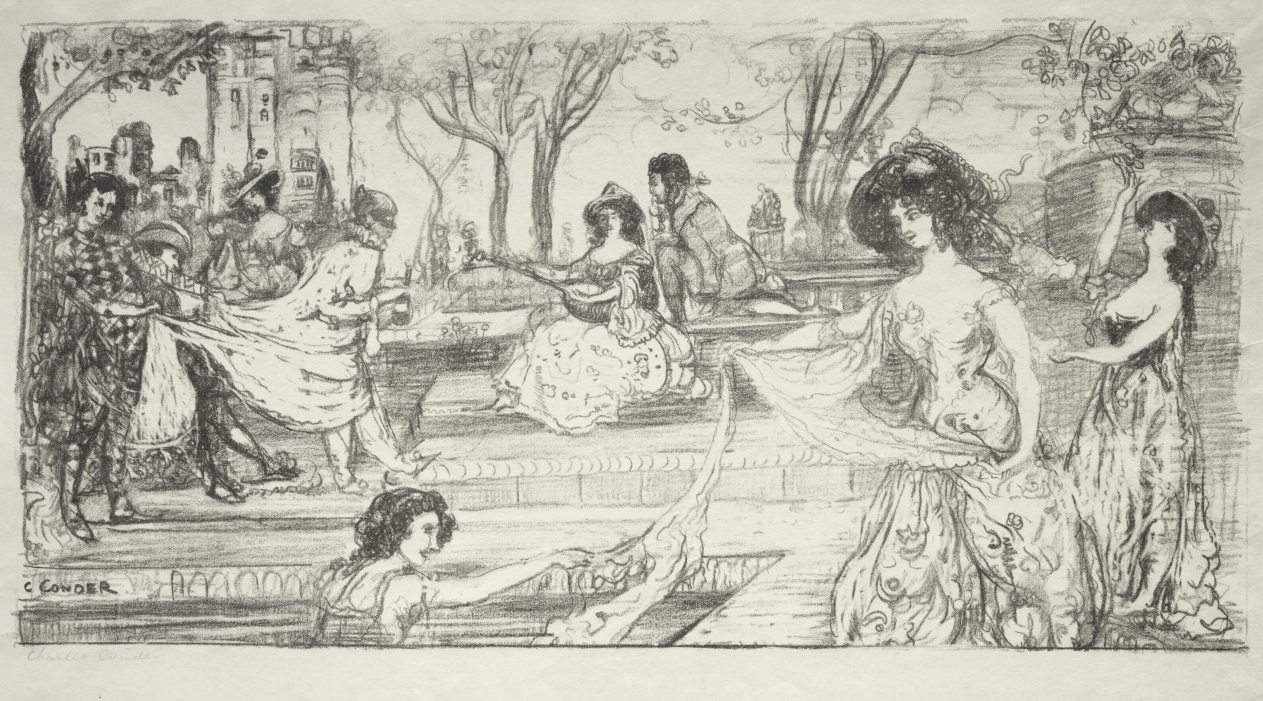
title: La Guitariste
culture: England, 19th century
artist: Charles Conder (British, 1868–1909)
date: 1900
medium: lithograph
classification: Print